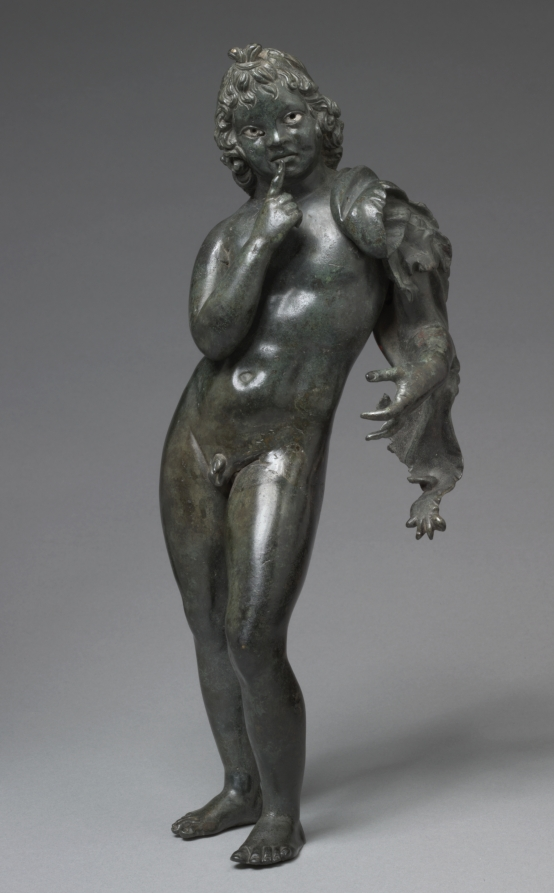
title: Statuette of Harpocrates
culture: Greece, Greco-Roman Period, late Ptolemaic Dynasty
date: c. 50 BCE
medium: bronze, hollow cast, with silver inlays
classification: Sculpture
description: Combining Hellenistic naturalism with a finger gesture associated with childhood in Egyptian tradition, this young figure represents Harpocrates, the Greek form of the Egyptian child sun god Horus, or Hor-pa-khred. A hole atop his head likely once held a double crown of Egypt, as on more traditionally Egyptian representations of Harpocrates.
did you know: The gesture this figure makes refers to the Egyptian hieroglyph for child, nn, 𓀁.